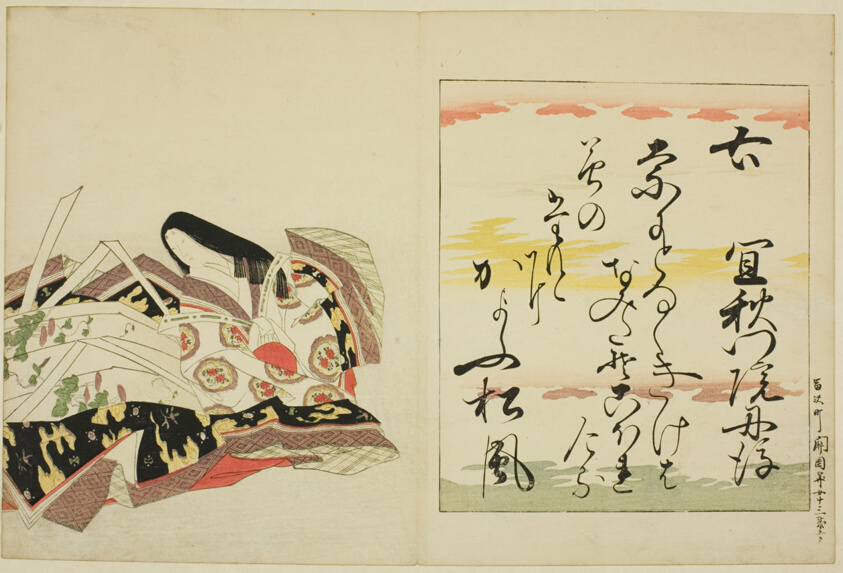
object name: Print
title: The Poetess Gishumon-in no Tango, from the series The Thirty-six Immortal Women Poets (Nishikizuri onna sanjurokkasen)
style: Japanese (culture or style)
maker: Chobunsai Eishi; Japanese, 1756-1829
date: Edo period (1615–1868), 1801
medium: Page from a color woodblock-printed volume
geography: Japan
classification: woodblock print; print; asian art